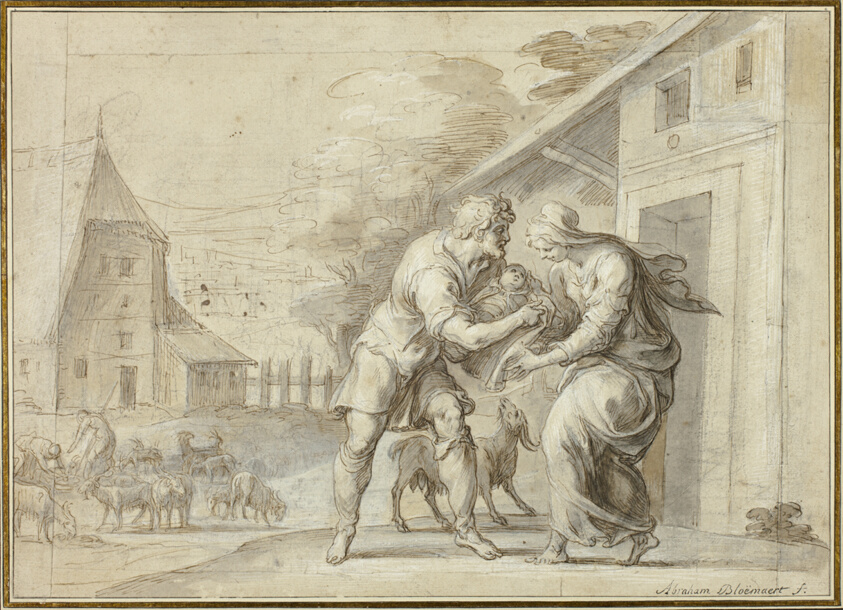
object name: Drawing and Watercolor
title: The Goatherd Lamon Handing the Infant Daphnis to His Wife Myrtele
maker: Ambroise Dubois (French, 1543-1614)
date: after 1606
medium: Pen and brown ink and brush and brown ink wash, with black chalk, brush and gray wash, and opaque white watercolor, on pieced cream laid paper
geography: France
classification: pen and ink drawings; drawings (visual works); prints and drawing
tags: mythology